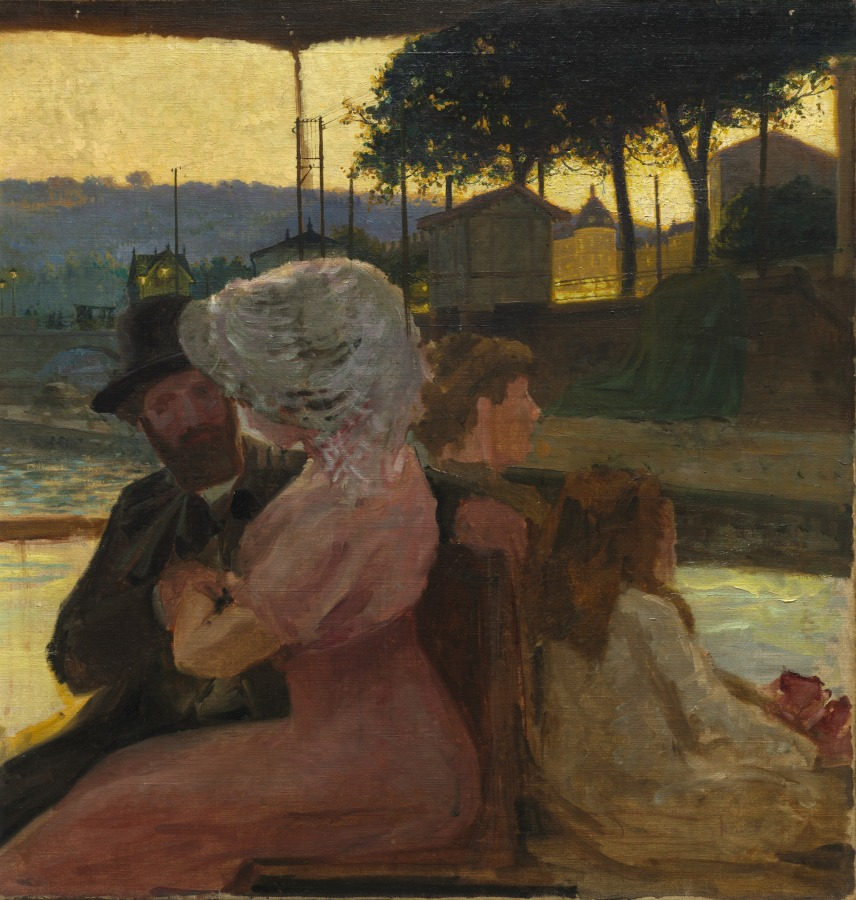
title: On the River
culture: France, late 19th-early 20th century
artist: attributed to Henri-Edmond Cross (French, 1856–1910)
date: c. 1900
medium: oil on canvas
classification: Painting